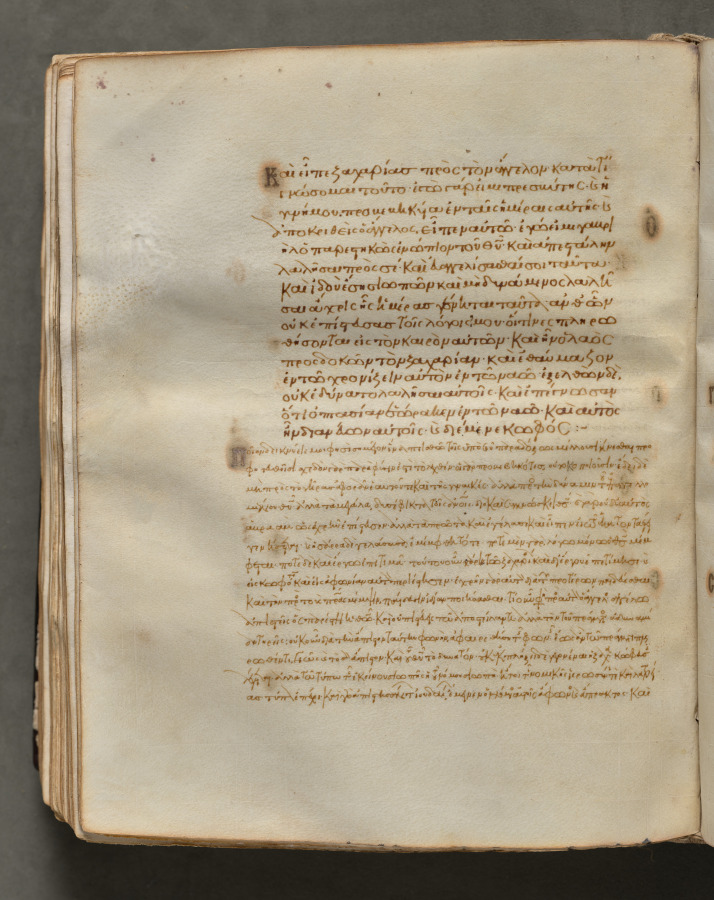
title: Text, folio 202 (verso), from a Gospel Book with Commentaries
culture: Byzantium, Constantinople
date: c. 1000–1100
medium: ink, tempera, and gold on vellum; leather binding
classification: Bound Volume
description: Each of the four gospels in this book opens on a page with brilliantly illuminated borders depicting the author of the text as well as birds-principally peacocks, symbols of the immortality of the soul-and fountains, representing the fountain of life and the salvation of the soul. This volume consists of 428 leaves with texts in Greek. Its level of sophistication suggests that it was probably written and decorated in a monastery in Constantinople.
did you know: Gospel Books were carried in procession through Byzantine churches.